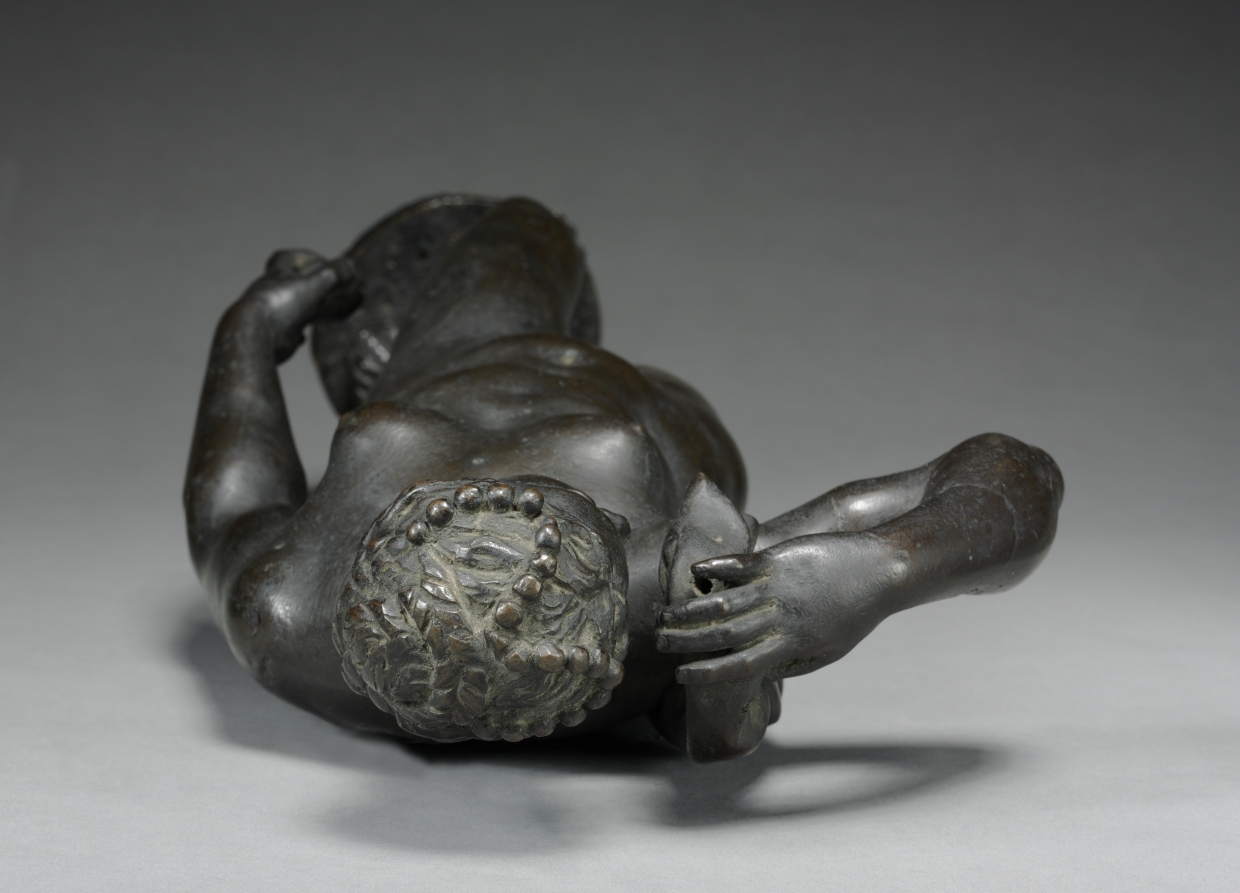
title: Venus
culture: Italy, 16th century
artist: Danese Cattaneo (Italian, 1509–1573)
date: c. 1560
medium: bronze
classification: Sculpture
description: Cattaneo's Venus is reminiscent of the ancient Aphrodite of Knidos by Praxiteles (Greek, c. 375–340 BC), as Venus holds her drapery in her right hand, leaving her body fully exposed. This work recalls Cattaneo's bronze sculptures of goddesses with the unbalanced curvature of the body and elaborately sculpted hair. Along with the hands and feet, the back of the figure is largely unfinished, indicating that it probably originally stood against a wall or in a niche.